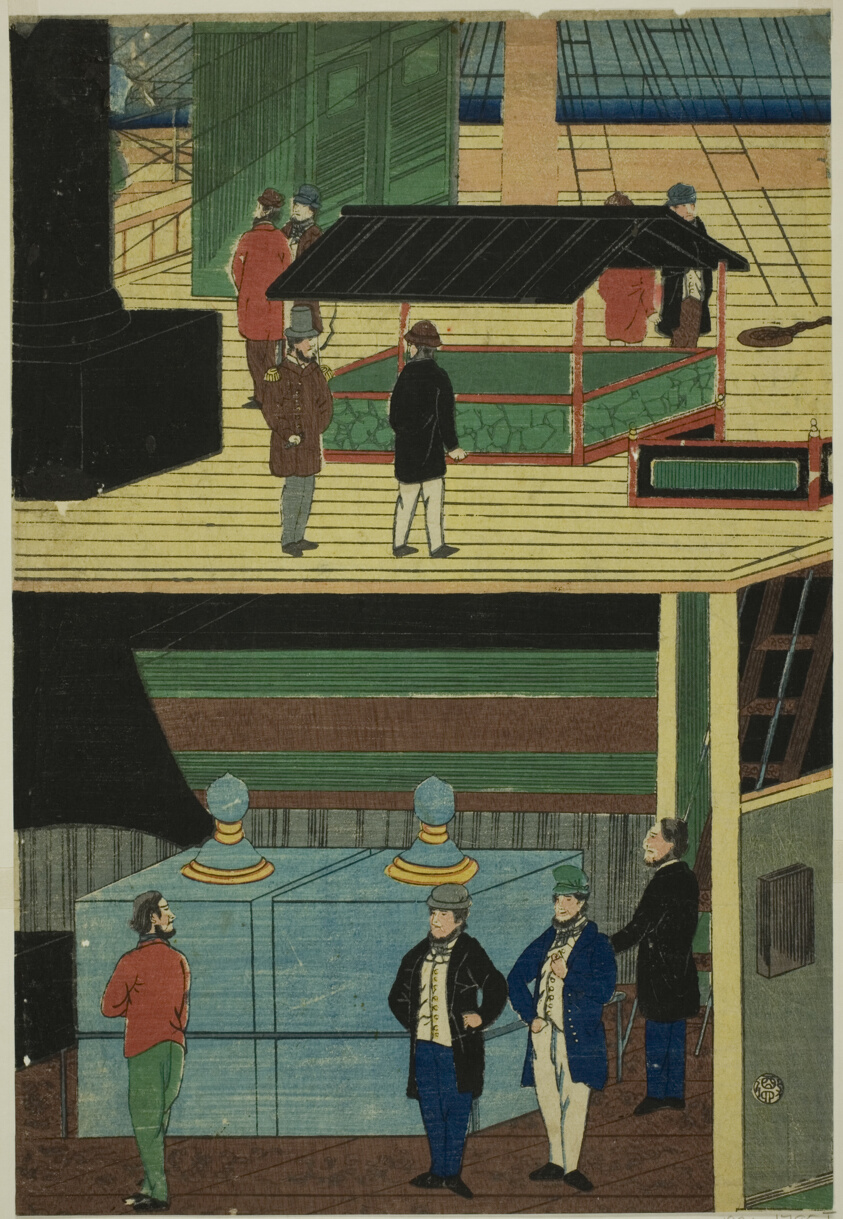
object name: Print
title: Interior of an American Steamship (Amerikakoku jokisen-chu no zu)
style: Japanese (culture or style)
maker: Utagawa Yoshikazu (Japanese, active c. 1850-70)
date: 1861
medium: Color woodblock print; oban triptych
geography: Japan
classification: woodblock print; print; asian art